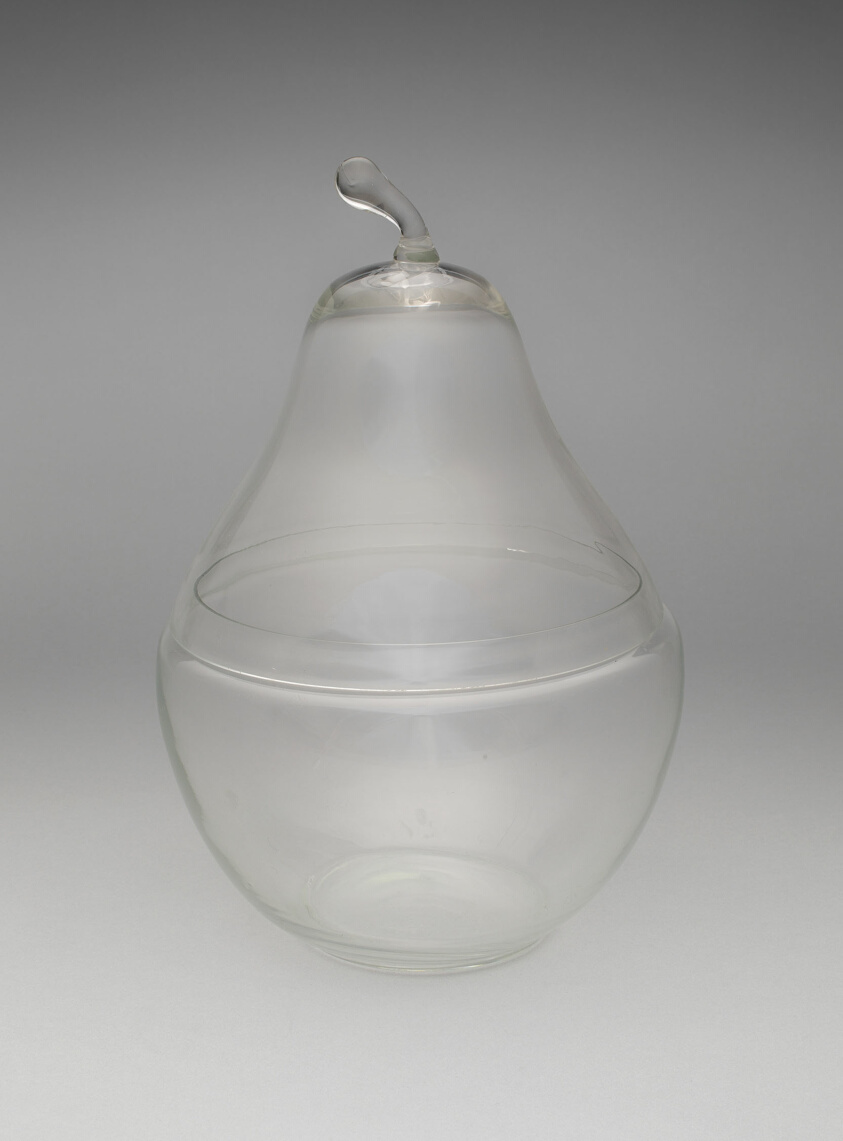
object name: Glass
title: Covered bowl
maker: Artist unknown (American, 19th–20th century)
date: 1880–1900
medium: Glass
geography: United States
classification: vessel; glass; american decorative arts; american arts; decorative arts